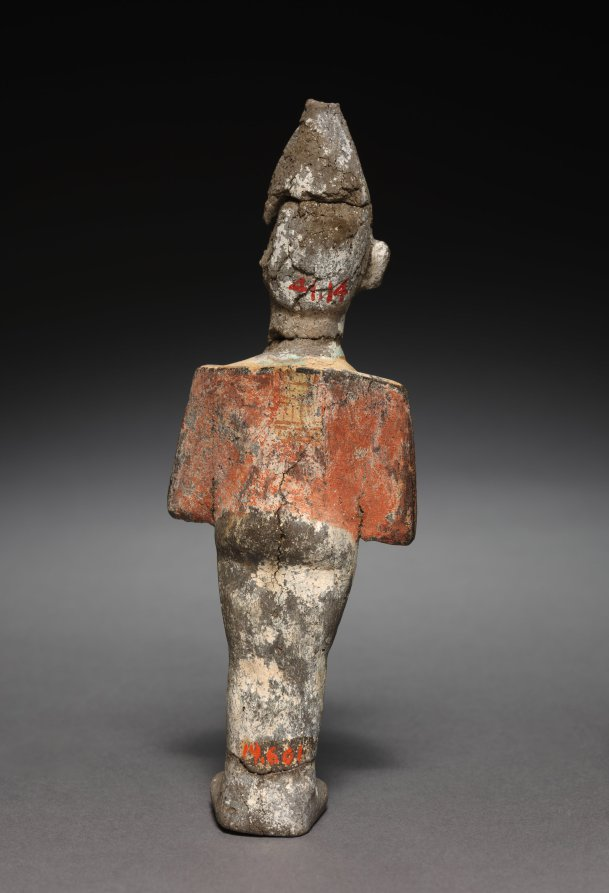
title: Statuette of Osiris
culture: Egypt, New Kingdom (1540–1069 BCE), Dynasties 19–20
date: 1295–1069 BCE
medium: painted terracotta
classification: Funerary Equipment